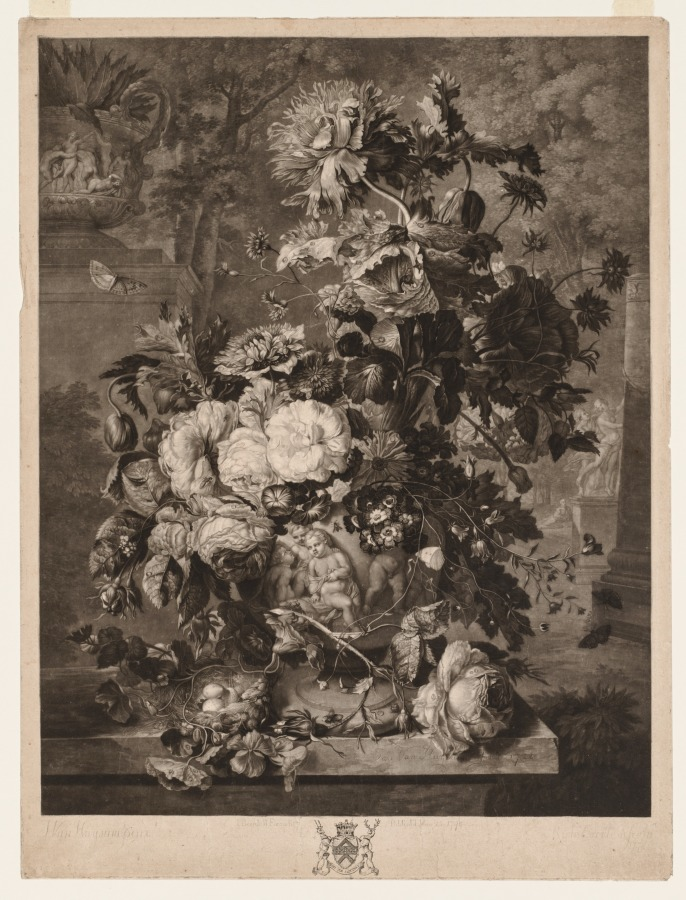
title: A Flower Piece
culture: England, 18th century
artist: Richard Earlom (British, 1743–1822)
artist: after Jan van Huysum (Dutch, 1682–1749)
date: 1778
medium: mezzotint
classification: Print